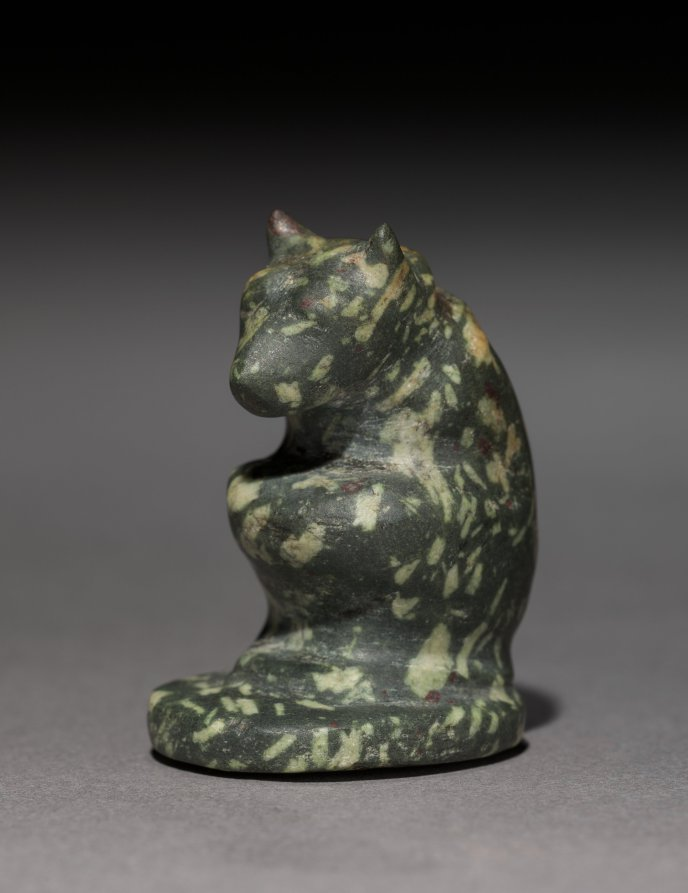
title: Amulet of a Crouching Bear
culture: Egypt, Late period (715–332 BCE)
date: 664–332 BCE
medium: green porphyry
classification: Amulets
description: For the Egyptians, the bear was an exotic species, and as early as 2400 BC it figures, though sporadically, in scenes of foreign tribute on tomb and temple walls. Representations of bears in the round are extremely rare. This bear, masterfully carved in hard greenish stone flecked with white, is a little gem. The animal rests on its haunches on a circular base, head bent forward, legs drawn up in a posture not unlike that of the classic pose for Egyptian gods. Sensitivity to such delightful details as the animal's perked-,up ears, tiny face, and wrinkled neck make this tiny giant a rare prize.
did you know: The bear is not native to Egypt, although until the beginning of this century it survived in Lebanon.